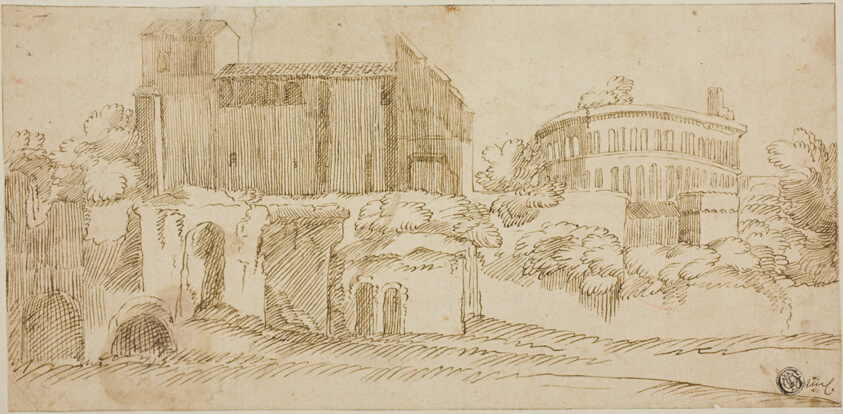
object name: Drawing and Watercolor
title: View of Church and Ruins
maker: After Giovanni Francesco Grimaldi; Italian, 1606-1680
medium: Pen and brown ink on tan laid paper, laid down on ivory laid card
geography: Italy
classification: pen and ink drawings; drawings (visual works); prints and drawing